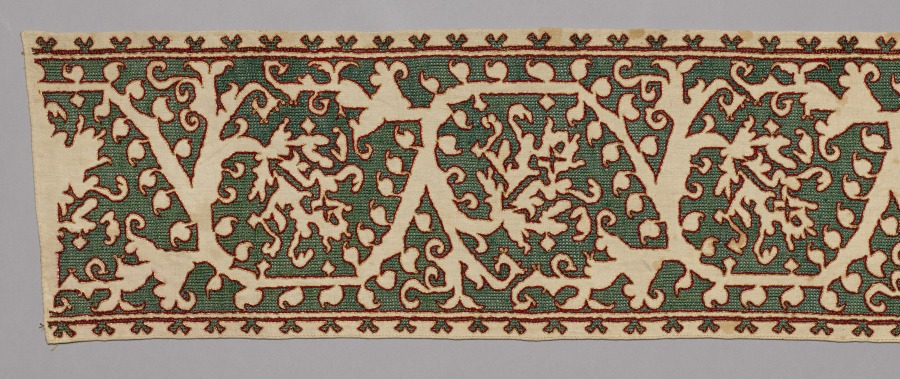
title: Embroidered Strip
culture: Italy, 17th century (copy of)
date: before 1916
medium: Linen: silk and gold filé, embroidery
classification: Embroidery